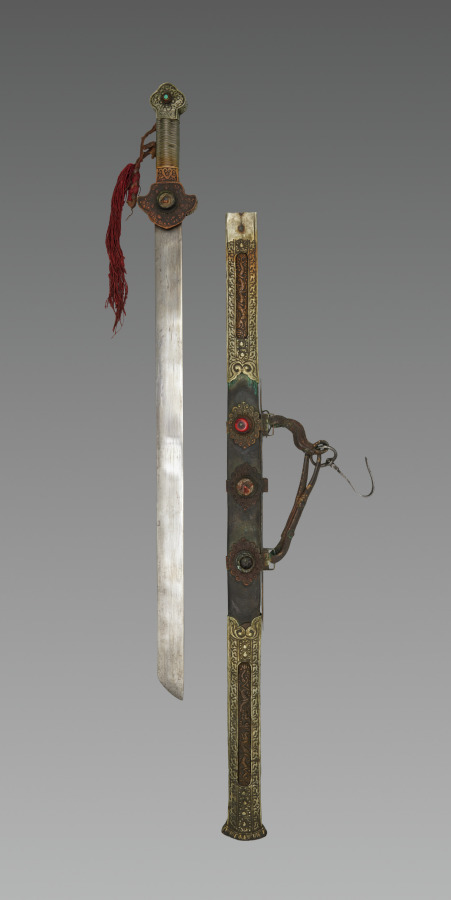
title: Sword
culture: Eastern Tibet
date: 1800s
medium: iron and silver with bone, turquoise, leather and brass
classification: Arms and Armor